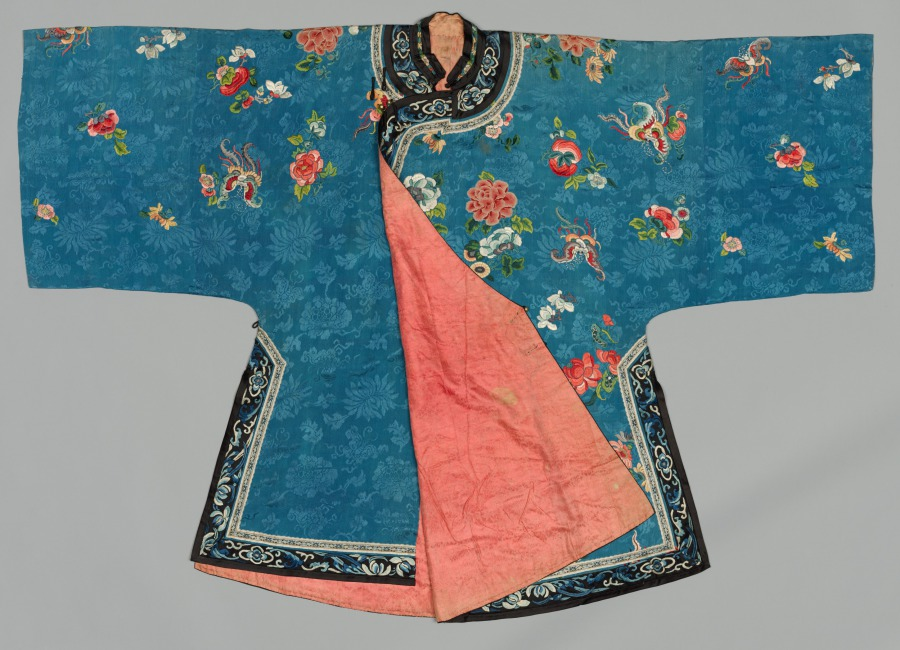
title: Han Woman's Jacket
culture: China, Qing dynasty (1644–1911)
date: 1880s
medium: Silk: embroidery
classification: Garment